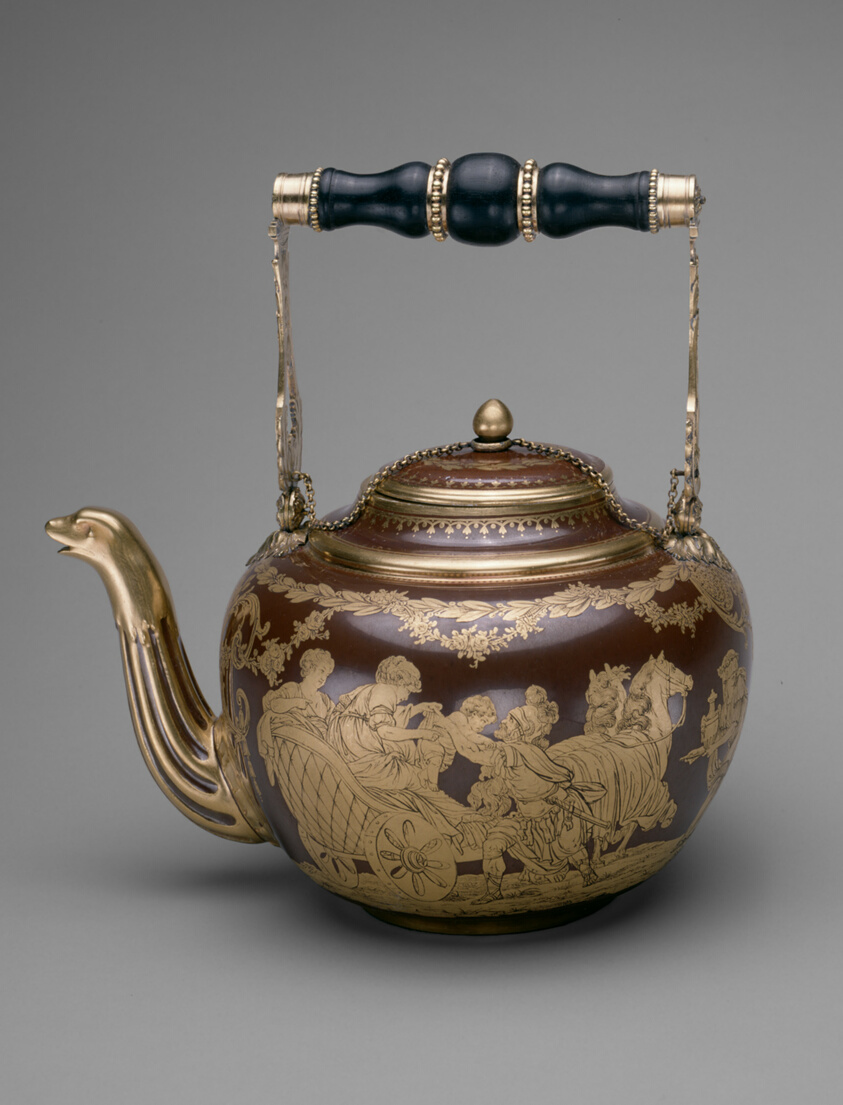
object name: Ceramics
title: Kettle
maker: Sèvres Porcelain Manufactory; French, founded 1740; Probably gilded by Charles-Eloi Asselin; French, 1743–1804; Mounts probably designed by Jean-Nicolas Bastin; French, died 1785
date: 1783/84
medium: Hard-paste porcelain, brown ground (fond laque), black enamel, and gilding; silver-gilt and ebony mounts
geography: Sèvres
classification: teaware; ceramics; porcelain; european decorative arts